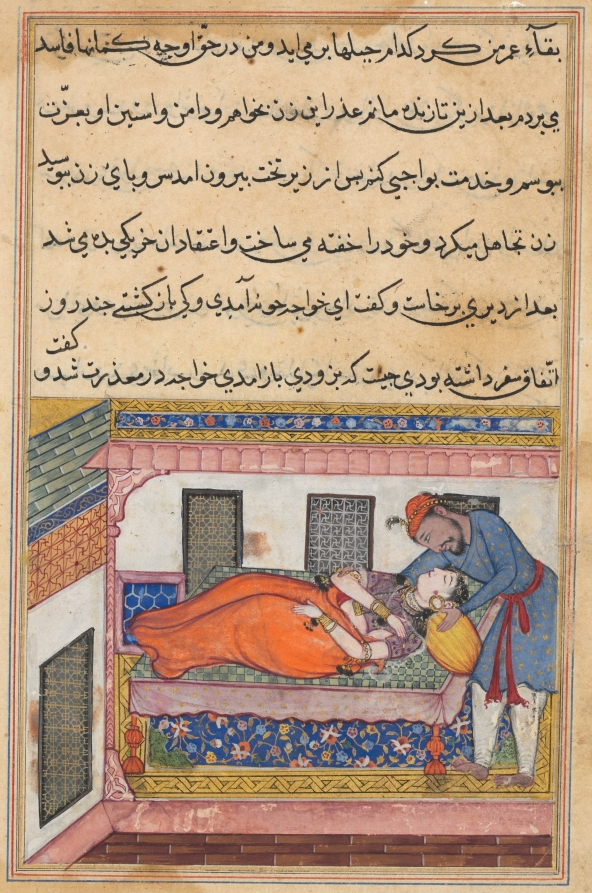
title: Shahr-Arai’s husband bends to kiss his wife who feigns sleep, from a Tuti-nama (Tales of a Parrot): Fortieth Night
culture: Mughal India, court of Akbar (reigned 1556–1605)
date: c. 1560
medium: gum tempera, ink, and gold on paper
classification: Painting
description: Shahr-Arai lies peacefully across the bed after meeting with her lover. She has successfully tricked her husband into believing that the young man is an adopted brother. The foolish and gullible husband kisses Shahr-Arai in gratitude for her perceived loyalty.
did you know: The windows of the bedroom are covered by jali, screens with geometric designs which allow a breeze to enter.